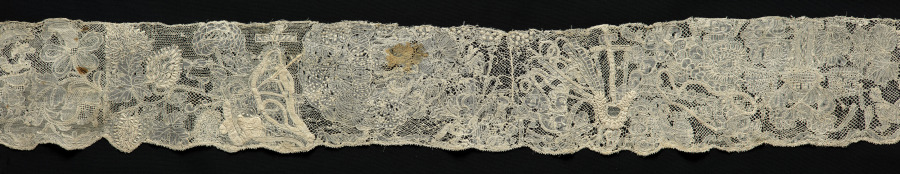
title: Flounce for Alb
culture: Unassigned, 1700s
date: 1700s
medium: Linen: needle lace (drawnwork) and embroidery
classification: Lace